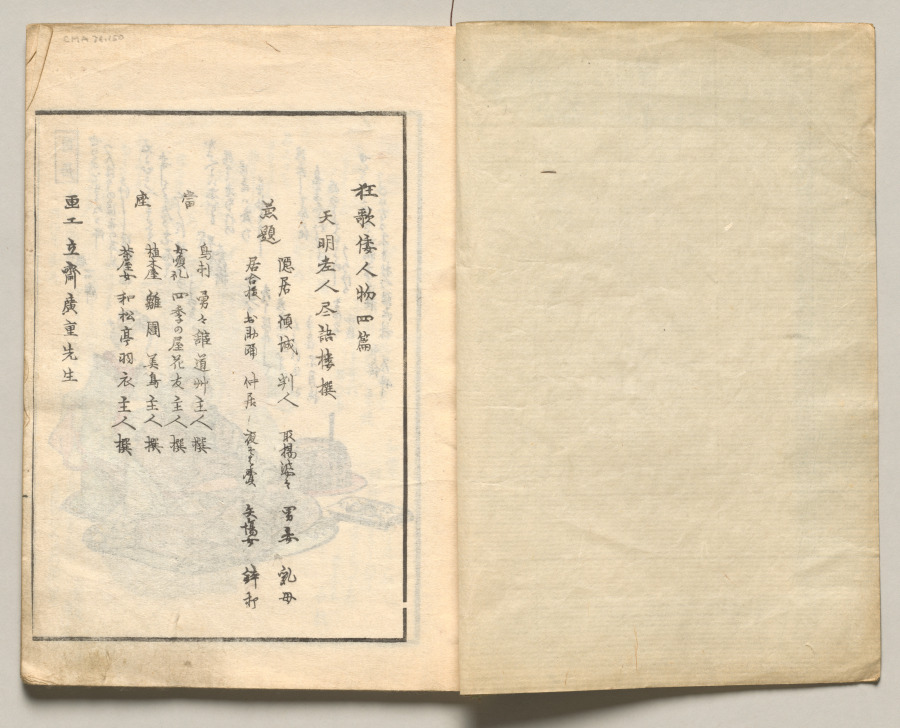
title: Spread One from Volume Four of People of Japan in Light Verse (Kyōka)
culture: Japan, Edo period (1615–1868)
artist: Utagawa Hiroshige (Japanese, 1797–1858)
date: 1857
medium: Woodblock-printed book; ink and color on paper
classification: Bound Volume